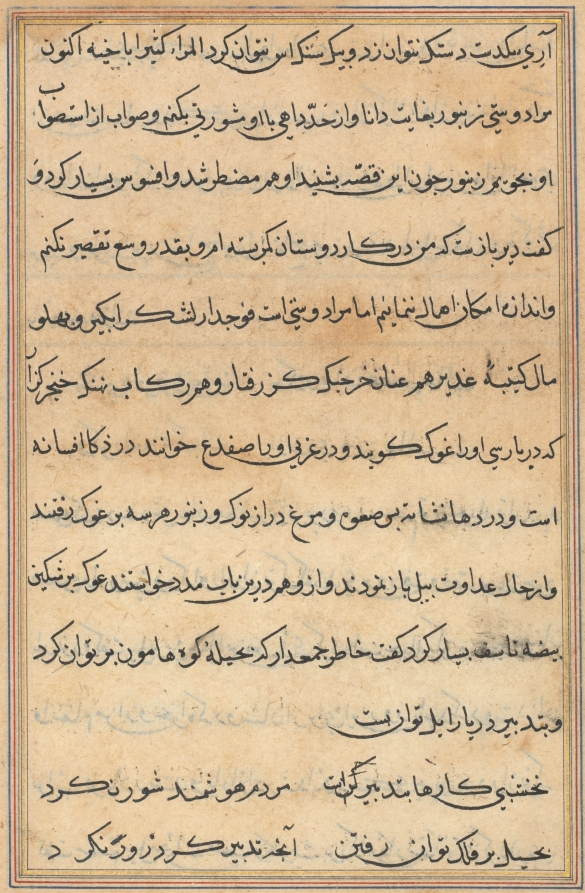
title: Page from Tales of a Parrot (Tuti-nama): text page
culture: Mughal India, court of Akbar (reigned 1556–1605)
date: c. 1560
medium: gum tempera, ink, and gold on paper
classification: Painting